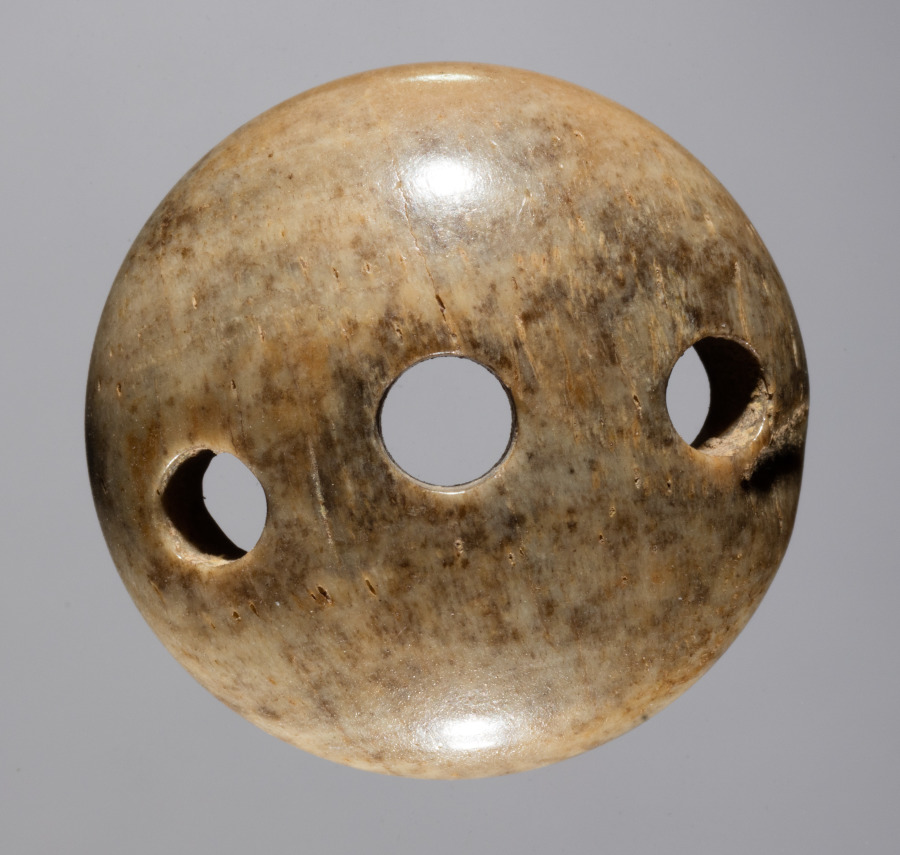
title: Spindle Whorl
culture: Iran, early Islamic period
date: 700s - 900s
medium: bone, incised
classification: Spindle Whorl